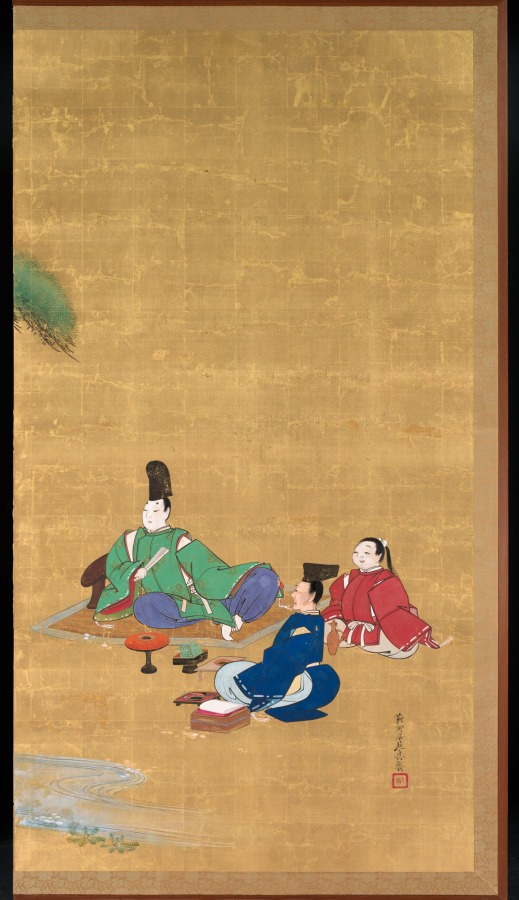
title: Nagisa Palace from the Tales of Ise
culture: Japan, Edo period (1615–1868)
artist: Shibata Zeshin (Japanese, 1807–1891)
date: late 1800s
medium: Two-panel folding screen; ink, color, lacquer, and gold on silk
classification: Painting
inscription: signed: Tairyuko Zeshin sei; sealed: Furumitsu.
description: This screen depicts an episode from the Tales of Ise, a 10th-century collection of poems and associated narratives in which the main character composes the following poem while drinking sake and viewing cherry blossoms: If, in this world of ours / All the cherry blossoms / Disappeared / The heart of spring / Might find peace. Our hero relaxes on a shoulder rest, gazing at the flowers, his sake dish before him on a lacquered stand. A plump boy attendant monitors the sake dishes, a ewer at the ready. An associate sits with paper, ink, and brush, poised to record poems.